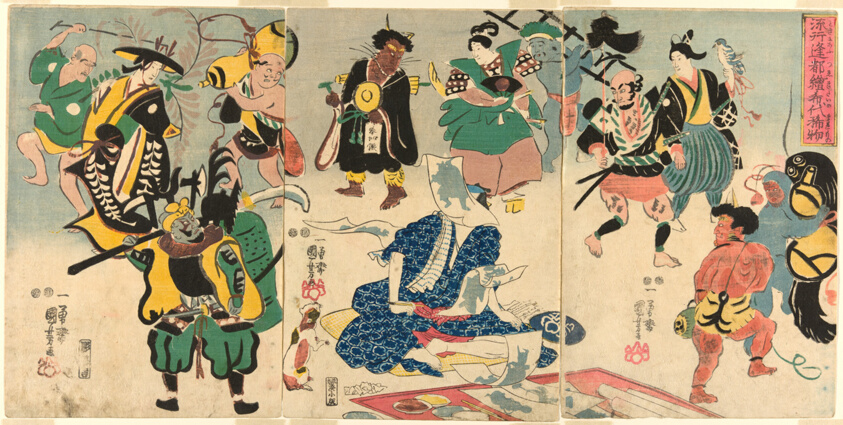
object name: Print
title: The Extraordinary Phenomenon of the Popular Otsu Picture (Tokini otsue kidai no maremono)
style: Japanese (culture or style)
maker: Utagawa Kuniyoshi (Japanese, 1779-1861)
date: 1848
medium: Color woodblock print; oban triptych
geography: Japan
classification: woodblock print; print; asian art